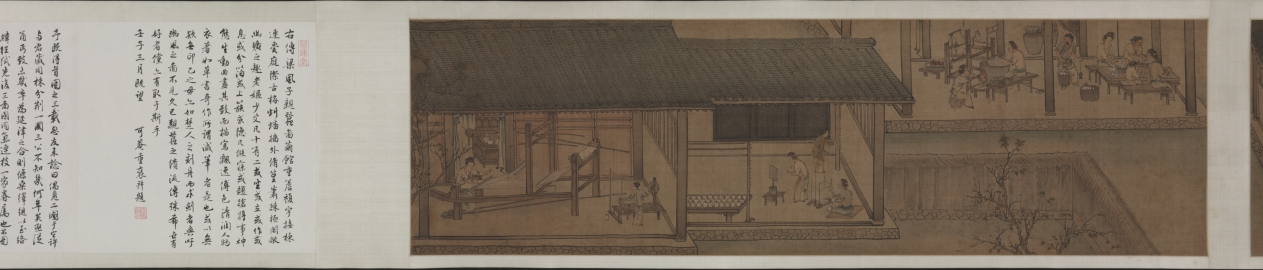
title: Sericulture (The Process of Making Silk)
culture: China, Southern Song dynasty (1127-1279)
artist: attributed to Liang Kai (Chinese, mid-1100s–early 1200s)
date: early 1200s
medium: Handscroll; ink and color on silk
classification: Painting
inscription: 3 colophons and 7 seals of Ch'eng Ch'i (20th c.).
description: By the Southern Song period, the economic center of the silk industry had shifted to the lower Yangzi delta, while the north continued to be troubled by wars. Divided into three sections, the handscroll illustrates 14 steps in the process of making silk, from the raising of silkworms to the weaving of silk cloth. The scroll’s scenes follow the illustrations of Lou Shou’s (1090–1162) Pictures of Tilling and Weaving (gengzhi tu), the first recorded painting of this genre, which was conceived in Hangzhou around 1145. However, in the Cleveland painting the artist groups several scenes of sericulture together under the roof of an open structure.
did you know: The painting is attributed to Liang Kai, a court artist active from about 1201 to 1204 at the Imperial Painting Academy in the city of Hangzhou, a major silk weaving center from that time to the present day.